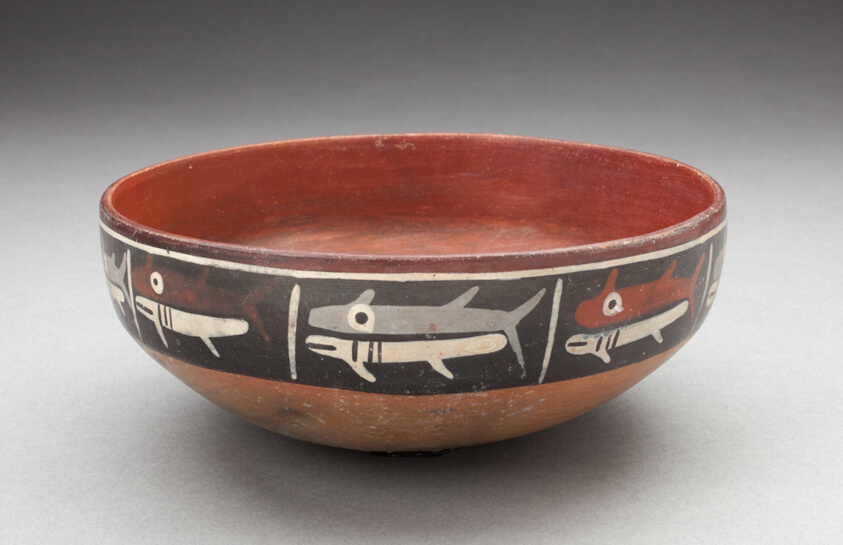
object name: Vessel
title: Bowl Depicting Row of Fish or Sharks Separated by Vertical Lines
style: nazca, early intermediate period, Pre-Columbian, americas, Arts of the Americas, andean, andes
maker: Nazca; South coast, Peru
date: 180 BCE–500 CE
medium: Ceramic and pigment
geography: Nazca Valley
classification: bowl; earthenware; art of the americas; ceramics; vessel